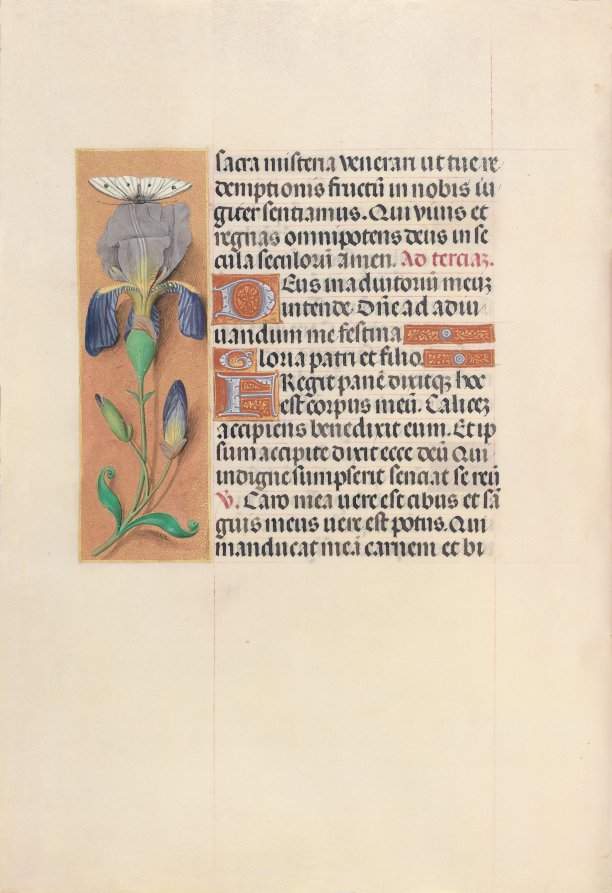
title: Hours of Queen Isabella the Catholic, Queen of Spain: Fol. 45v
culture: Flanders, Ghent and Bruges, late 15th century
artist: Master of the First Prayerbook of Maximillian (Flemish, c. 1444–1519)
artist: and Associates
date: c. 1500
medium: ink, tempera, and gold on vellum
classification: Bound Volume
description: This manuscript was illuminated by a circle of at least five highly organized manuscript painters active in the Flemish cities of Ghent and Bruges. The principal illuminator was Alexander Bening, who painted the majority of the book's miniatures. Manuscripts produced by this circle of artists are renowned for the decoration of their borders, which typically feature a rich variety of realistically-painted flowers, birds, and butterflies. This prayer book, called a book of hours, was intended not for a cleric, but for the private devotions of a lay person-in this case, Isabella the Catholic, Queen of Spain (1451-1504). Isabella's coat of arms embellishes the book's frontispiece. It is unlikely that the book was commissioned by the Queen herself; rather, she probably received it as a diplomatic gift from someone courting her patronage, perhaps Cardinal Francisco Jimenez de Cisneros. A Franciscan friar, Jimenez was dependent upon Isabella for his advancement, first to the post of Queen's confessor in 1492, and then to Archbishop of Toledo in 1495.